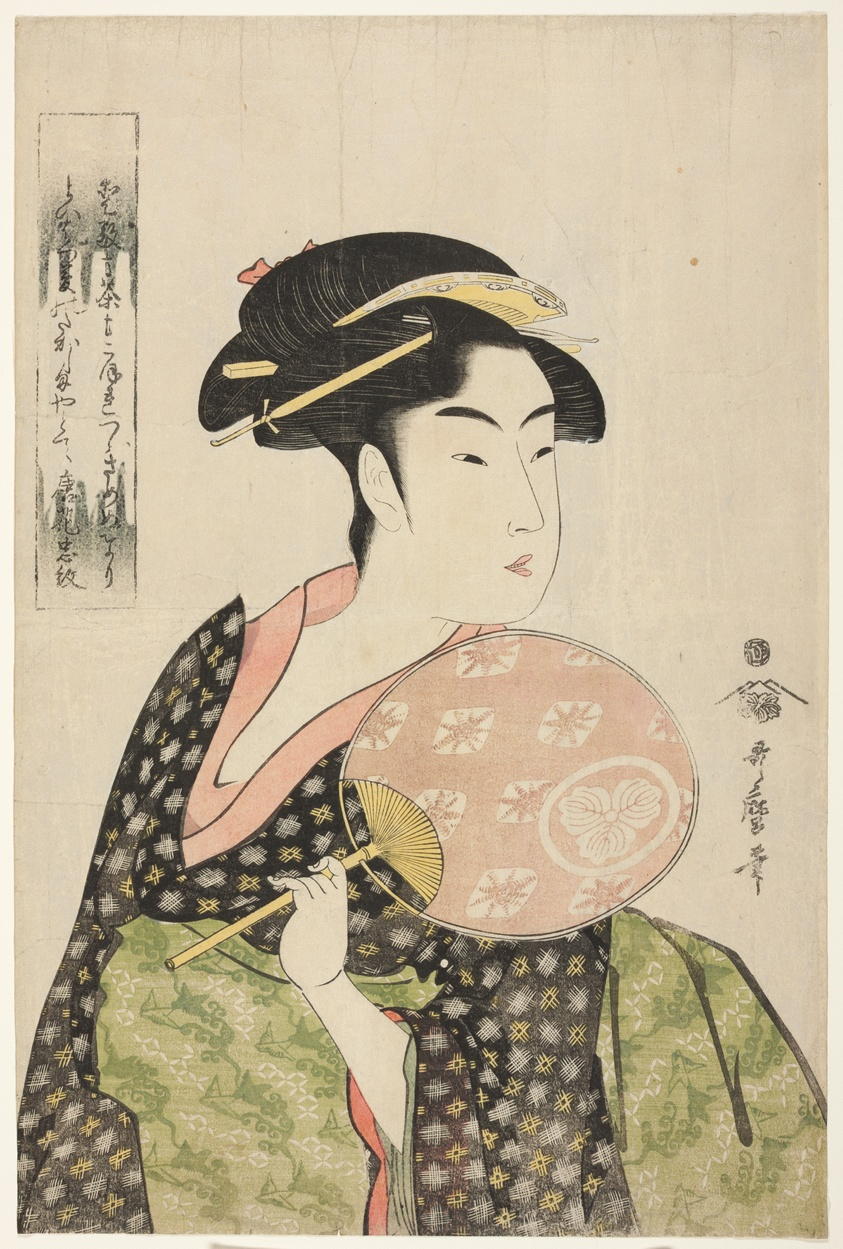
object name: Print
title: Takashima Ohisa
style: Japanese (culture or style)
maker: Kitagawa Utamaro 喜多川 歌麿; Japanese, 1753 (?)-1806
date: c. 1793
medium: Color woodblock print; oban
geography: Japan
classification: woodblock print; print; asian art